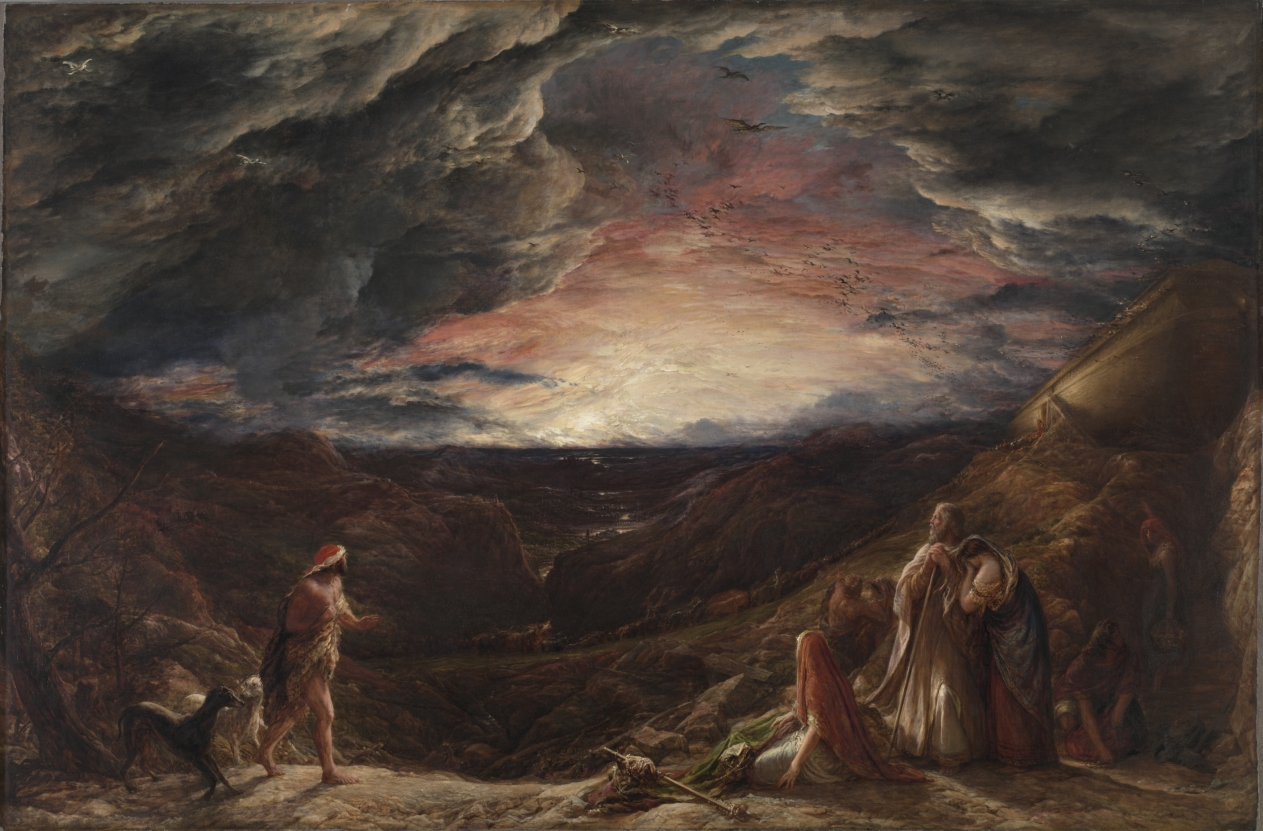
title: Noah: The Eve of the Deluge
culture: England, 19th century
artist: John Linnell (British, 1792–1882)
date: 1848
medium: oil on canvas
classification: Painting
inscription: Signed lower right: j. linnell / 1848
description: This painting powerfully illustrates changes in taste over time. Before it was even completed, the painting was purchased for the considerable sum of £1,000 by a newly wealthy industrialist who admired John Linnell’s modern approach to religious subjects. In 1913, however, the painting was sold at auction for only £130. Victorian painting had fallen out of favor among collectors who did not appreciate Linnell’s hotly colored landscapes that combined biblical stories and poetry (in this case Milton’s Paradise Lost) with close study of the English landscape. Linnell was also known for financially supporting the destitute and elderly William Blake, whose mesmerizing painting of Saint Matthew is in the museum's collection.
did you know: Linnell was an extremely versatile artist who worked in oils and watercolors, painted miniatures on ivory, and was skilled as an engraver.